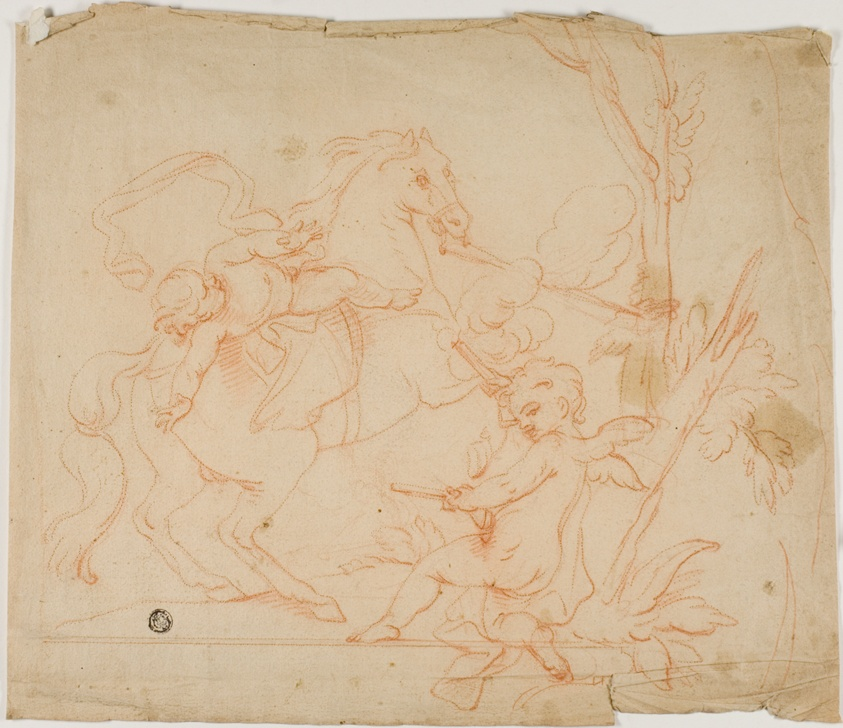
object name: Drawing and Watercolor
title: Putto Firing at Putto on Horseback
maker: Follower of Charles Le Brun (French, 1619-1690)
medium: Red chalk on tan laid paper, pricked for transfer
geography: France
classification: chalk; drawings (visual works); prints and drawing